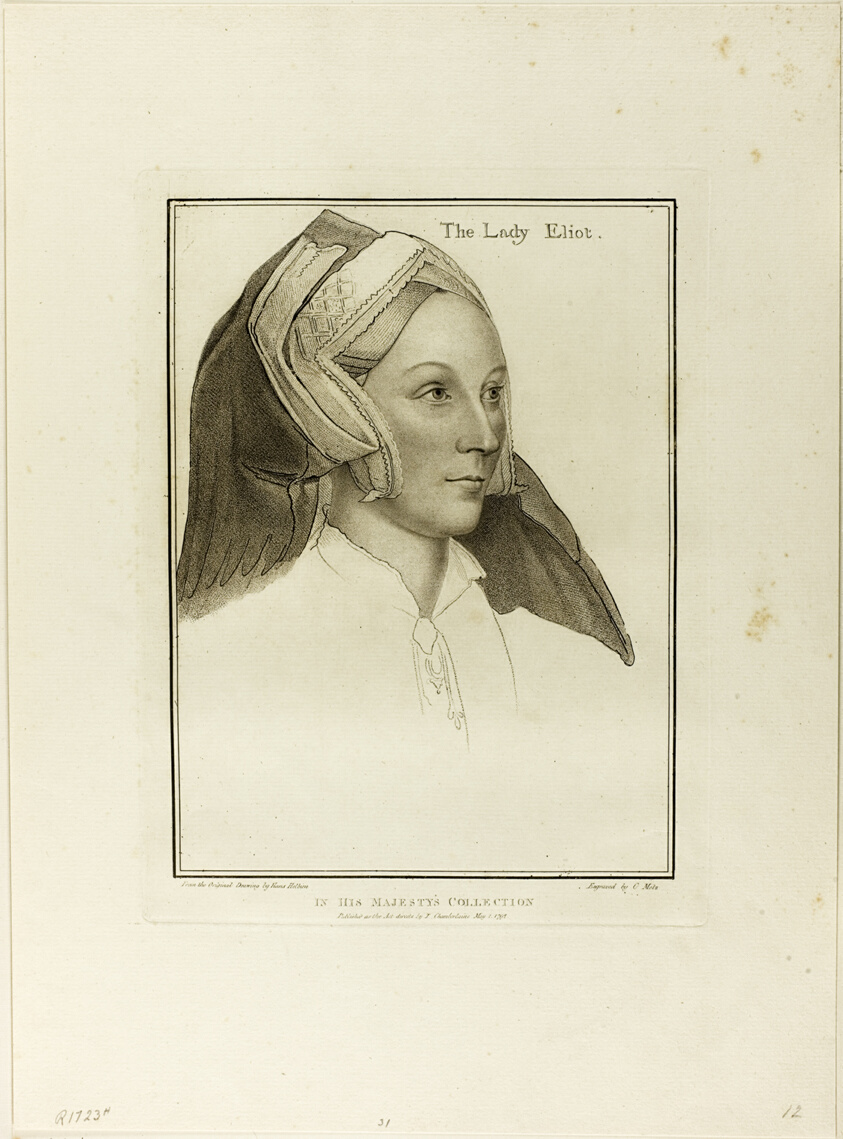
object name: Print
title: Lady Elyot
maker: Francesco Bartolozzi (Italian, 1727-1815); after Hans Holbein the younger (German, 1497-1543)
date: May 1, 1792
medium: Stipple engraving on cream wove paper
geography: Italy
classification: engraving; print; prints and drawing